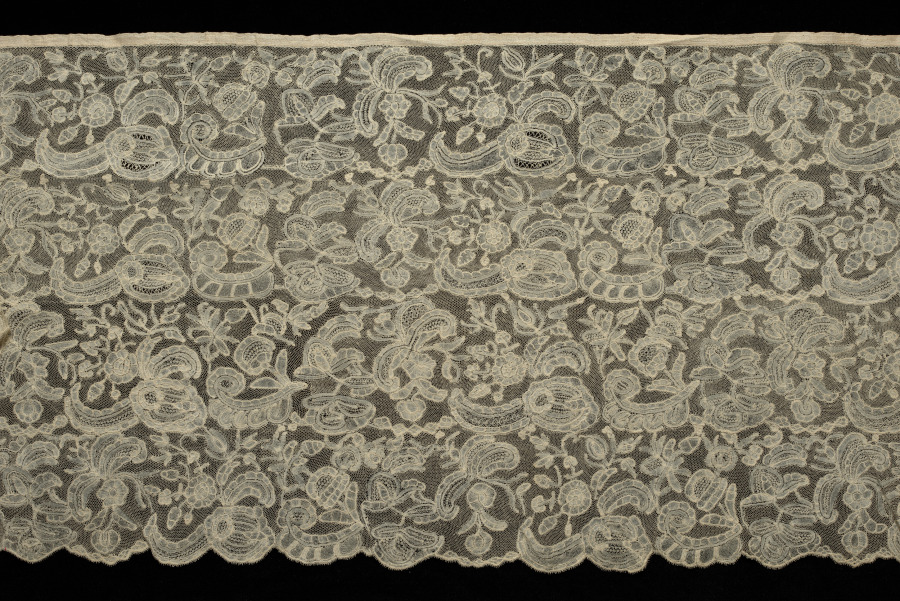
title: Lace Flounce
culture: Flanders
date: 1700s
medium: Linen: bobbin lace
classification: Lace